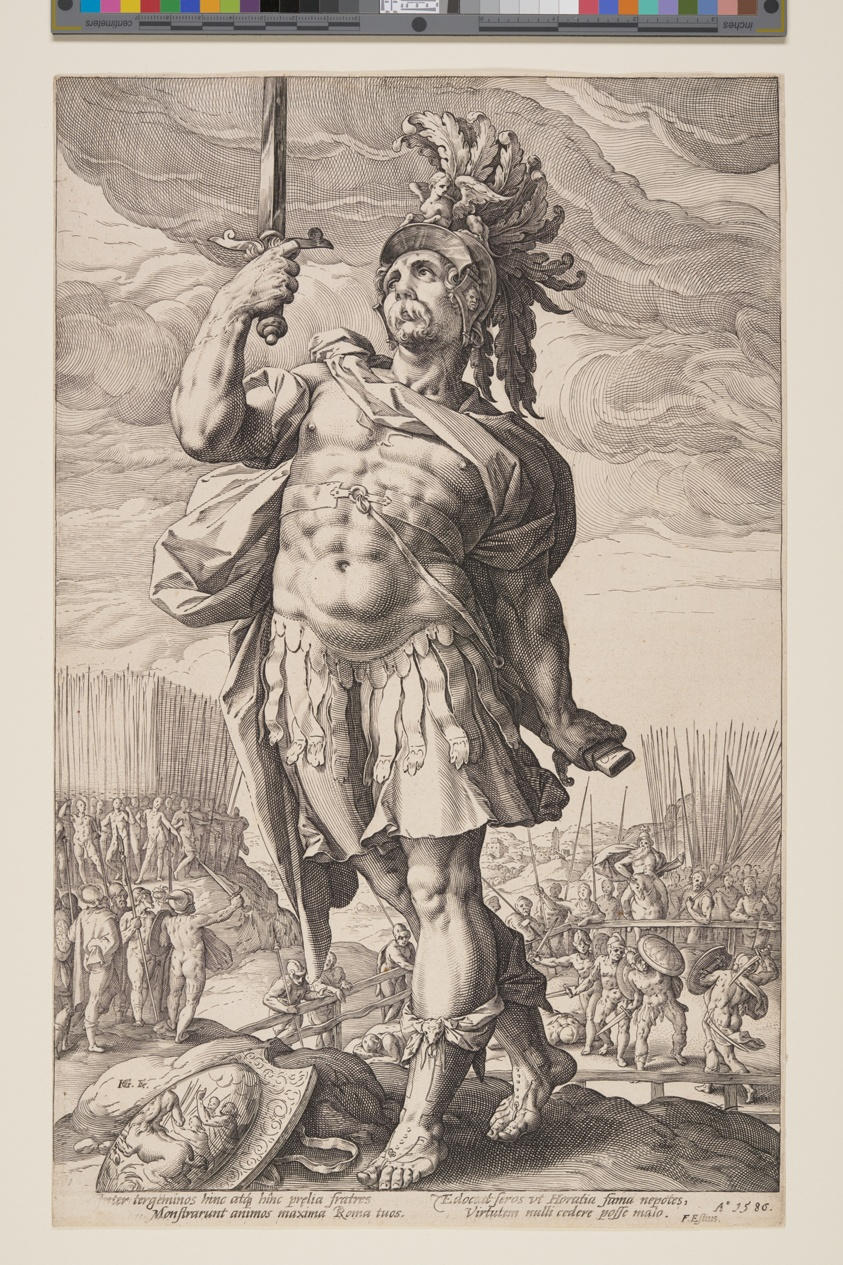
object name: Print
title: Publius Horatius, from The Roman Heroes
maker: Hendrick Goltzius (Dutch, 1558–1617)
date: 1586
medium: Engraving on ivory laid paper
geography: Netherlands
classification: print; paper; prints and drawing; engraving